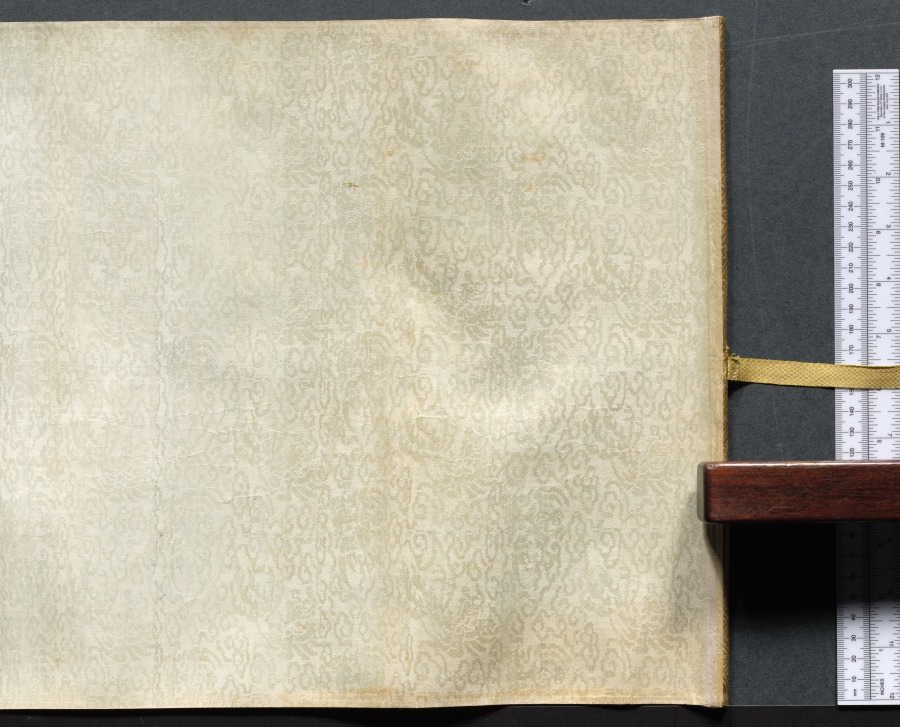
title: Four Poems: Calligraphy in Cursive Script (xingshu)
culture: China, Ming dynasty (1368–1644)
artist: Chen Jiru (Chinese, 1558–1639)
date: 1500s-1600s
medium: handscroll; ink on gold speckled paper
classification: Calligraphy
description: Written in graceful calligraphy with well-composed characters, the artist communicates his thoughts and state of mind in four poems. Characters written in dark, thick strokes convey rhythm, and indicate the moment after the writer had paused to recharge his brush with ink. Chen Jiru was a native of Huating (modern Shanghai). His calligraphy style resembles that of his friend, influential calligrapher Dong Qichang (1555–1636). Unlike Dong, Chen did not pursue government service: he burned his Confucian robes, declined a summons to serve at court, and immersed himself in literature, calligraphy, and painting.